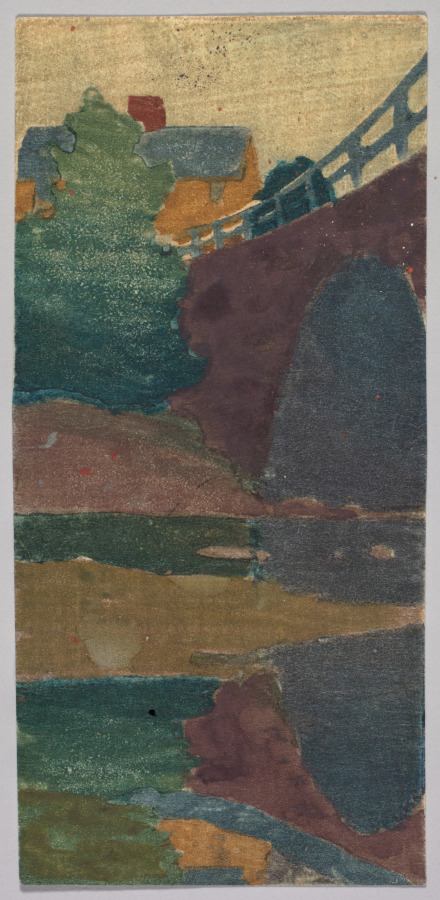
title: The Old Bridge or Ipswich Bridge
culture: America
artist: Arthur Wesley Dow (American, 1857–1922)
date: c. 1893–95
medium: Color woodcut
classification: Print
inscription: verso, upper right, in graphite: 12.24